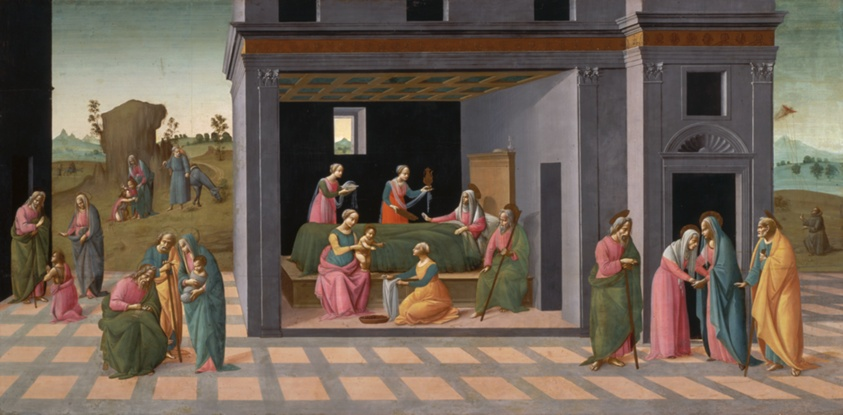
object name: Painting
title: Scenes from the Life of Saint John the Baptist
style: Renaissance, 15th century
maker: Bartolomeo di Giovanni (Italian, active c. 1465-1501)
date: 1490/95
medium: Tempera on panel (poplar)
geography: Italy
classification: painting; Italian; tempera; european painting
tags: Saint John the Baptist, interior, saints, Christian subjects, Christianity, religious, religion